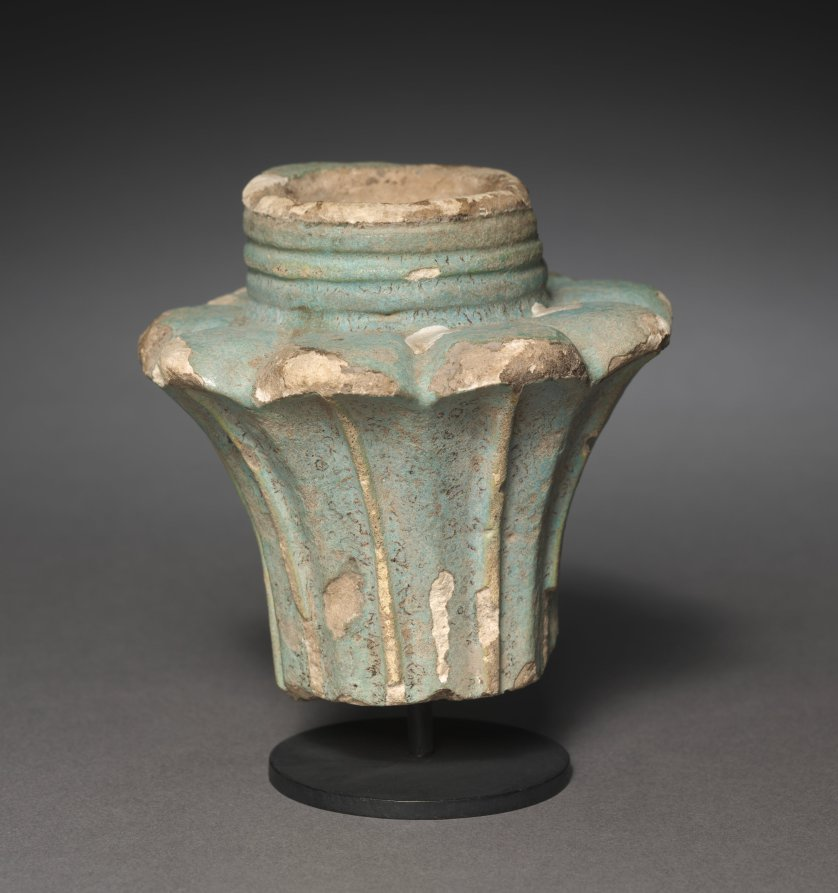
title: Votive Palm Column Capital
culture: Egypt, Greco-Roman period (332 BCE–395 CE), Roman empire (30 BCE–395 CE)(?)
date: 30 BCE–395 CE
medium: pale turquoise faience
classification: Sculpture